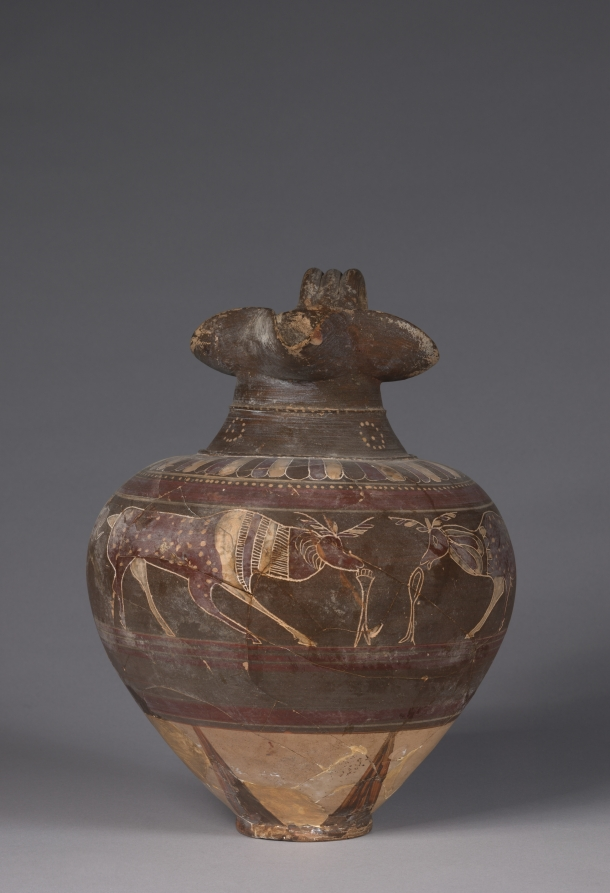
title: Polychrome Oinochoe (Wine Jug): Deer and Lions (?)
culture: Etruscan (Etrusco-Corinthian), probably made at Vulci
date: c. 600–575 BCE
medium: ceramic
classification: Ceramic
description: The animal frieze decorating the widest part of this round-bodied wine jug recalls black-figure pottery imported to Etruria from Greece (especially Corinth). The shape itself, with trefoil mouth and raised handle to facilitate pouring, also resembles Greek models, as do the simple tongues and rays above and below. But the polychromed animals—brightly painted with added white and reddish-purple—identify the vase as Etruscan, likely made at Vulci. The two deer seem to be grazing on stylized plants, unconcerned about the unusual animals pursuing them; these may be lions with horns and long tongues.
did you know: Four animals encircle this jug—two grazing deer and two predators, perhaps lions.